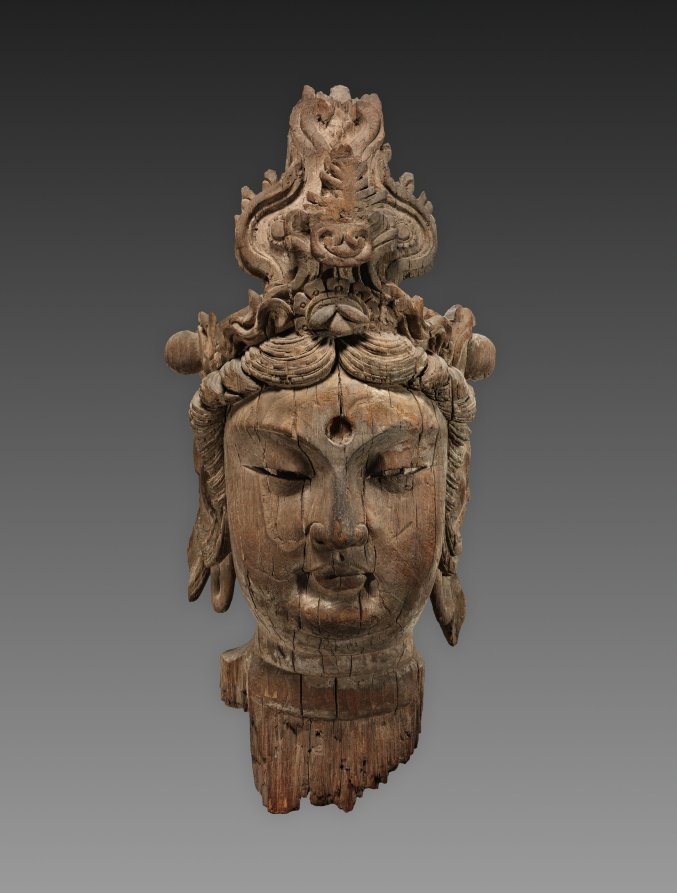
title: Head of a Bodhisattva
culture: China, reportedly from Henan province, Northern Song (960-1127) to Jin dynasty (1115-1234)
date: 1100s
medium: wood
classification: Sculpture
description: This large head of a Bodhisattva figure, an enlightened being that vowed to help humans on earth, was once part of a monumental sculpture in a public Buddhist setting.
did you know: The eyes and the hole in the forehead were originally set with semiprecious stones.